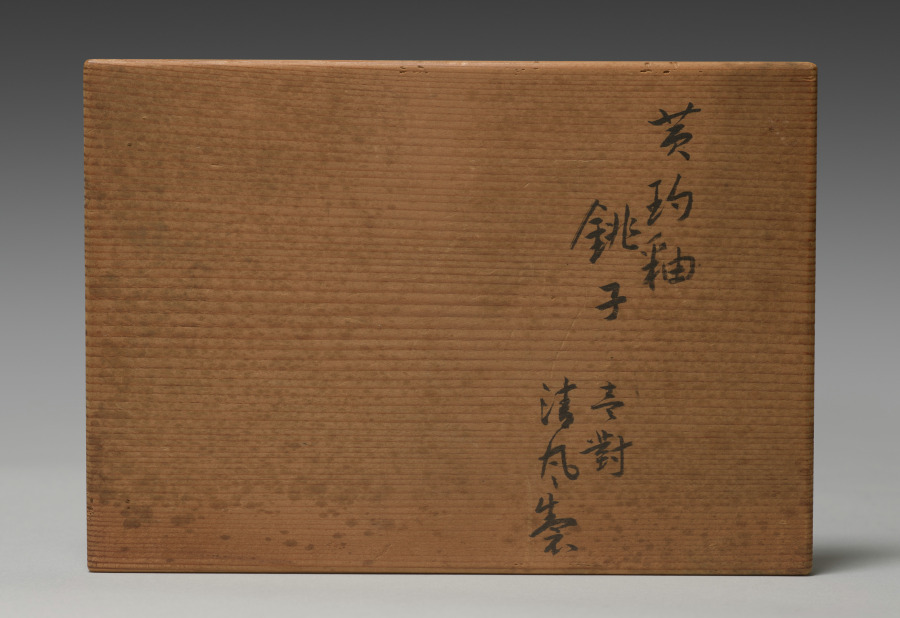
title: Sake Pourers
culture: Japan, Taishō period (1912–26) or Shōwa period (1926–89)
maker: Seifū Yohei IV (Japanese, 1872–1951)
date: 1914–46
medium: Pair of sake pourers; porcelain with yellow glaze and bamboo handles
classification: Ceramic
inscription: 清風造 。 【印】 清風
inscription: 成山清風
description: Like his father, Yohei IV also produced works with red or yellow monochrome glazes. His yellow-glazed works include this pair of sake pourers, a set of five drinking cups CMA 2022.217, and a sweets bowl molded into the shape of a chrysanthemum CMA 2022.218.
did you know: The lid's handle is made of bamboo.